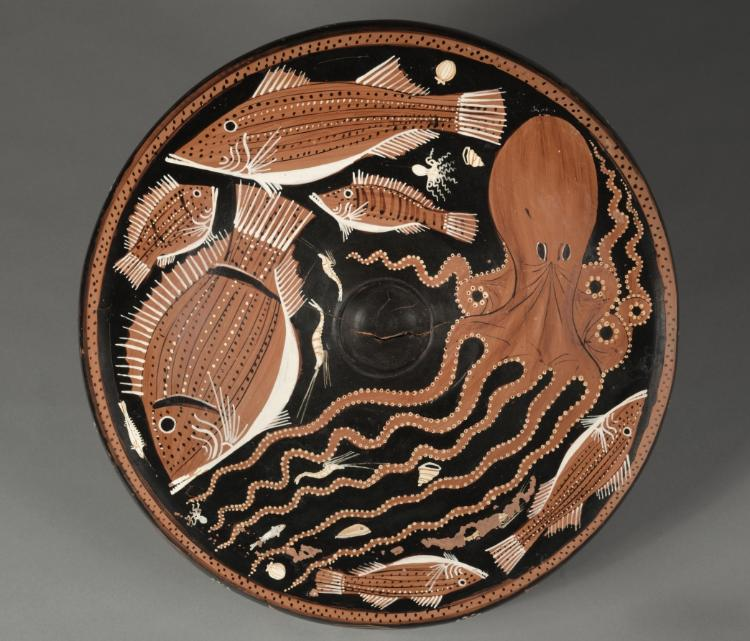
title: Red-Figure Fish Plate: Octopi, Mullet, Bream, Shellfish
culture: South Italian, Paestan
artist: attributed to Asteas/Python Workshop (South Italian, Paestan, active c. 360–320 BCE)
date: c. 340–330 BCE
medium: ceramic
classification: Ceramic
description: Although first developed in Athens, red-figure fish plates became especially popular in South Italy and Sicily in the 300s BC. All feature a short foot and a small central depression, but those produced in the workshop of Asteas and Python, like this one, are the largest and most ornate. Archaeologists have closely studied the fish and other sea creatures represented, identifying many of them with species still found (and eaten) in the Mediterranean; included here are octopi, mullet, bream, and various shellfish.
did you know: Perfect for serving seafood, this plate features images of sea creatures and a central well for dipping or collecting juices.